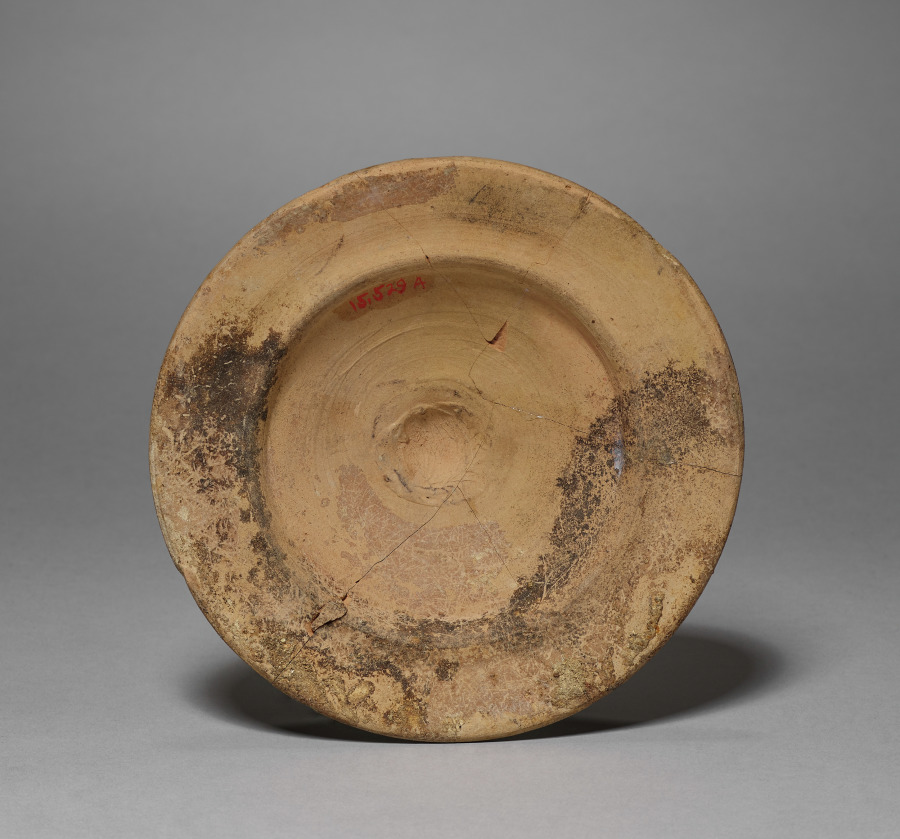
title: Lid for Two-Spouted Strainer Askos (Flask)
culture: South Italian, Daunian or Canosan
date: 300–200 BCE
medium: ceramic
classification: Ceramic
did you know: The lid has been broken and repaired.